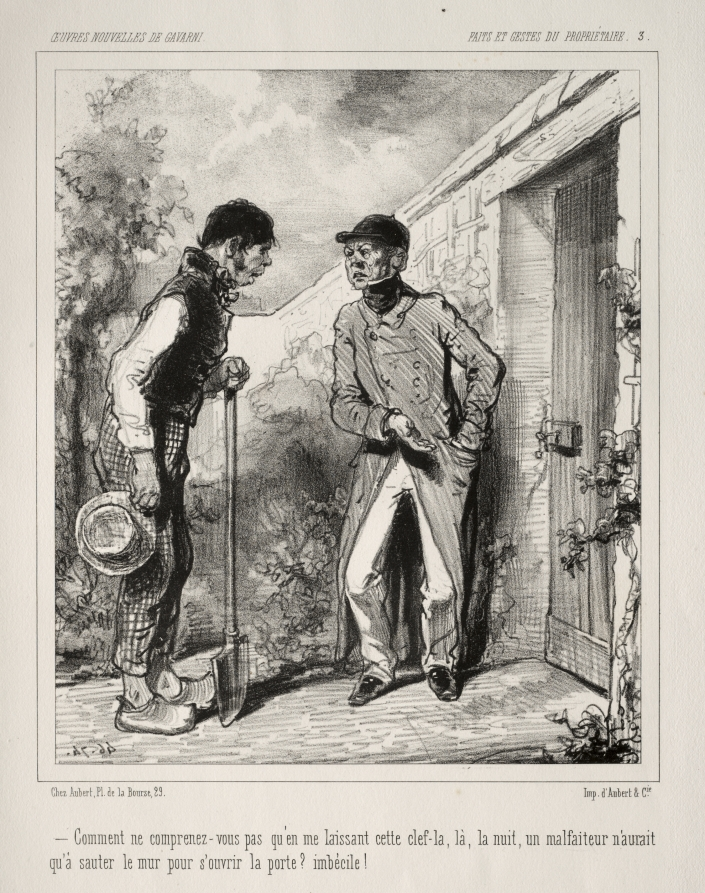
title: Faite et Gestes du Propriétaire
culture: France, 19th century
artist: Paul Gavarni (French, 1804–1866)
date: c. 1847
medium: lithograph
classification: Print